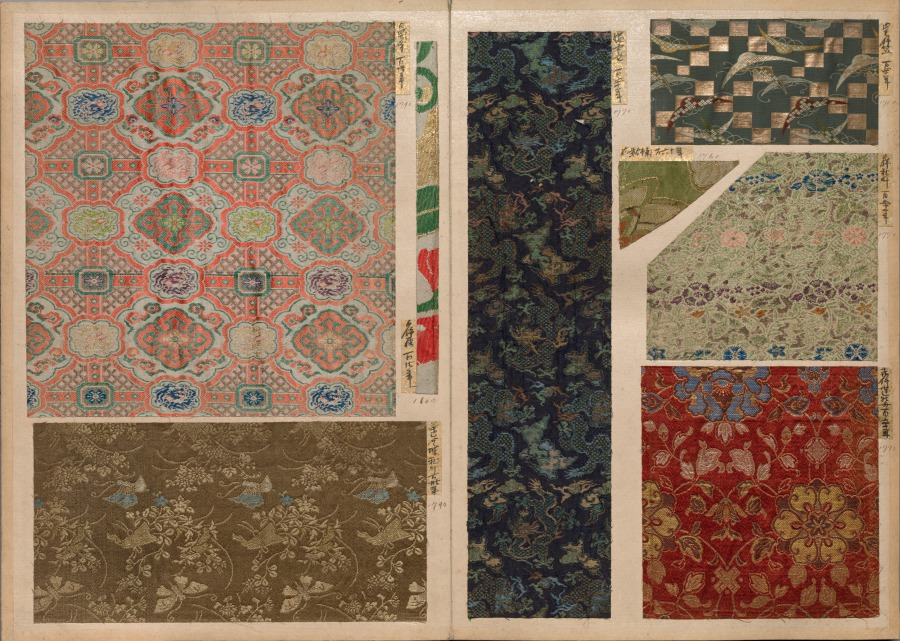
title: Album of Textile Samples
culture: Japan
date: 1790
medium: silk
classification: Textile